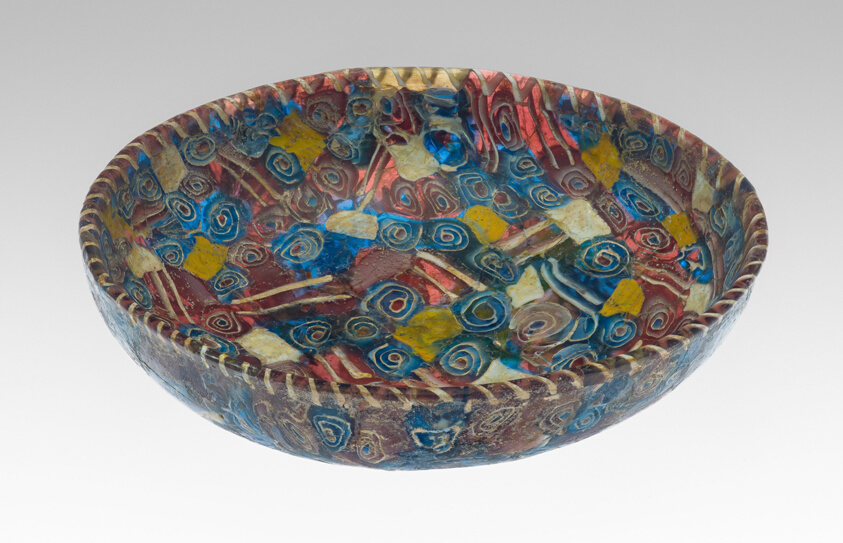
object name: Vessel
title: Dish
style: roman (ancient, style or period), ancient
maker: Hellenistic or early Roman; eastern Mediterranean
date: Mid 2nd-early 1st century BCE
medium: Glass, mosaic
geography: Eastern Mediterranean Region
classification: vessel; dish (vessel); container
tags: dining, drinking